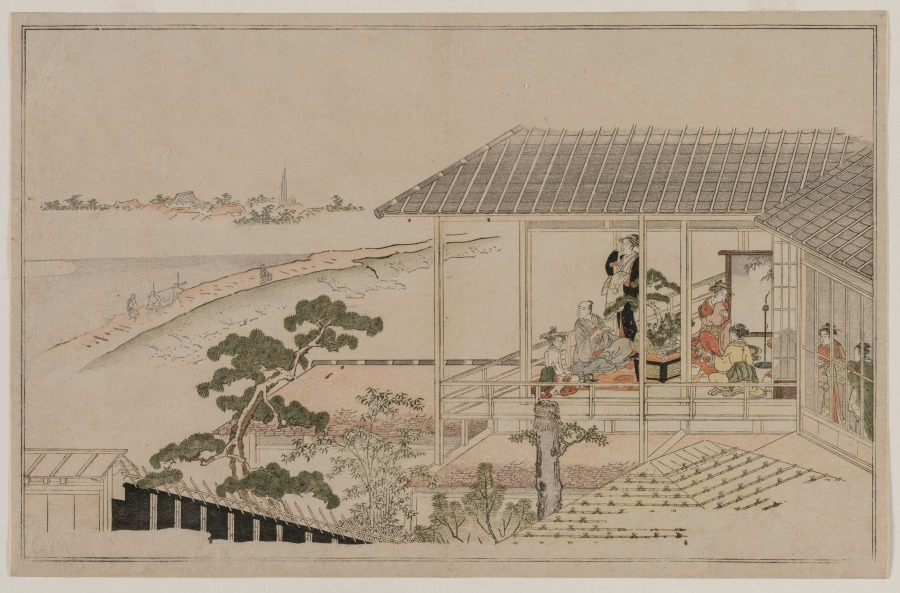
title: Moonrise Over the Nihon Embankment and the Yoshiwara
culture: Japan, Edo period (1615–1868)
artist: Kitagawa Utamaro (Japanese, c. 1754–1806)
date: 1790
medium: color woodblock print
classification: Print